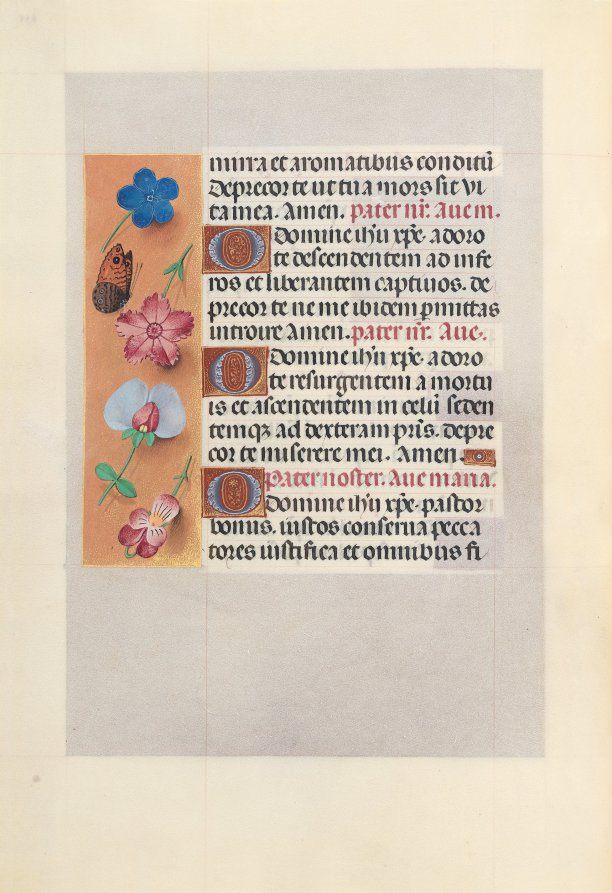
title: Hours of Queen Isabella the Catholic, Queen of Spain: Fol. 265v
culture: Flanders, Ghent and Bruges, late 15th century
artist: Master of the First Prayerbook of Maximillian (Flemish, c. 1444–1519)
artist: and Associates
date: c. 1500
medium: ink, tempera, and gold on vellum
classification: Bound Volume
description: This manuscript was illuminated by a circle of at least five highly organized manuscript painters active in the Flemish cities of Ghent and Bruges. The principal illuminator was Alexander Bening, who painted the majority of the book's miniatures. Manuscripts produced by this circle of artists are renowned for the decoration of their borders, which typically feature a rich variety of realistically-painted flowers, birds, and butterflies. This prayer book, called a book of hours, was intended not for a cleric, but for the private devotions of a lay person-in this case, Isabella the Catholic, Queen of Spain (1451-1504). Isabella's coat of arms embellishes the book's frontispiece. It is unlikely that the book was commissioned by the Queen herself; rather, she probably received it as a diplomatic gift from someone courting her patronage, perhaps Cardinal Francisco Jimenez de Cisneros. A Franciscan friar, Jimenez was dependent upon Isabella for his advancement, first to the post of Queen's confessor in 1492, and then to Archbishop of Toledo in 1495.